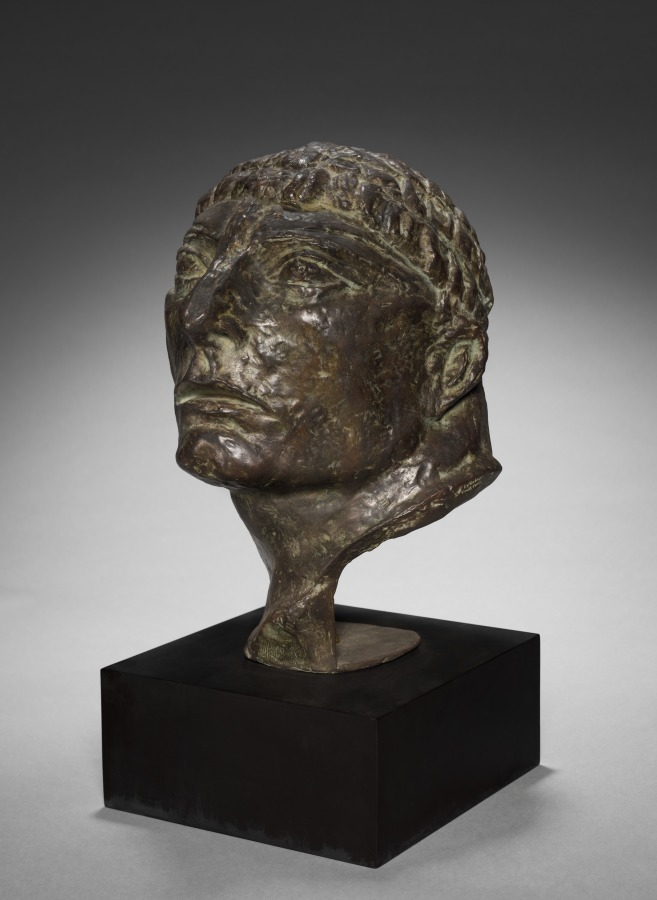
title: Mask of Hercules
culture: France, 20th century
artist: Emile Antoine Bourdelle (French, 1861–1929)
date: 1909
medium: bronze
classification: Sculpture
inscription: Inscribed at neck, lower left: "© Bourdelle"; beneath right ear: "E. Godard/Fondr Paris / 7"